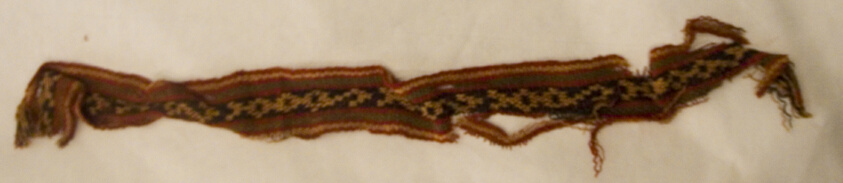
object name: Textile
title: Fragment (Band)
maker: Peru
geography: Peru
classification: textile; weaving